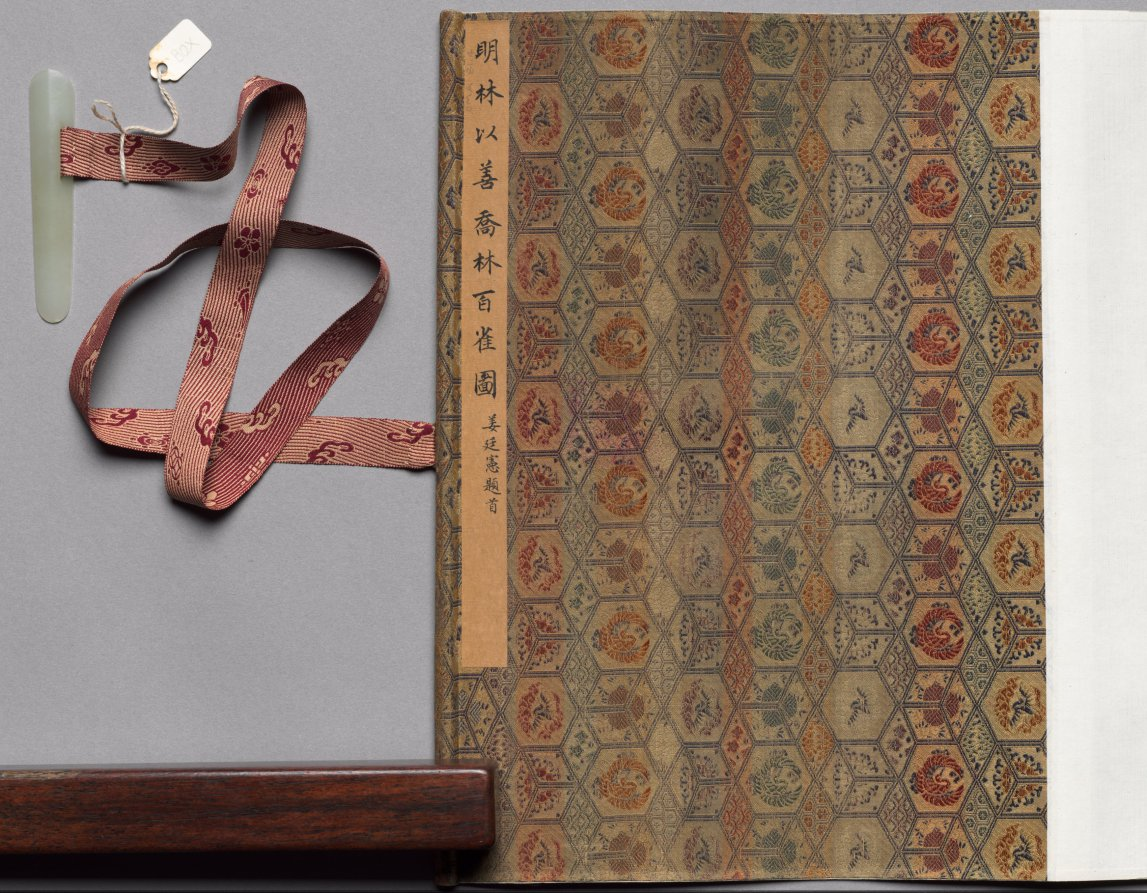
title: A Hundred Sparrows in a Lofty Grove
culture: China, Ming dynasty (1368–1644)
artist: attributed to Lin Liang (Chinese, 1416–1480)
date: 1368–1644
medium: handscroll; ink on silk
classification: Painting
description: Sparrows engaged in all kinds of activities frolic amid leafy branches, blades of grass, rocks, and a waterfall. As our eyes move over the scroll, the artist engages us in enjoying the sparrows’ carefree movements in a natural setting. The charming birds were painted from close observation in swift and fluent brushstrokes. Sparrows are a common bird and in Chinese painting they often represent the commoner in human society as opposed to the noble pheasant or peacock representative of the ruling class.